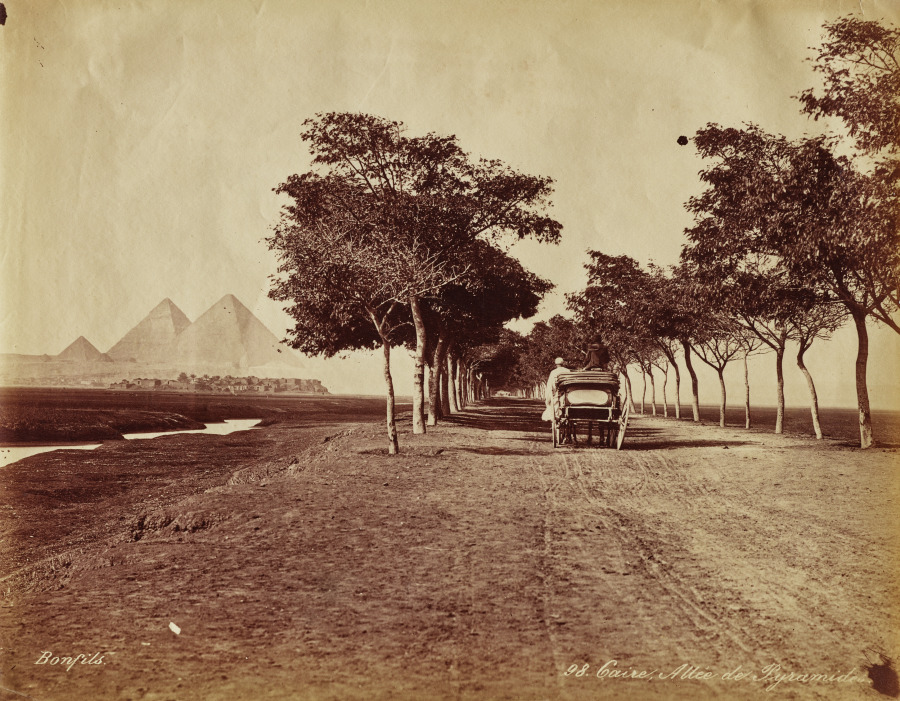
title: Caire. Allée de Pyramides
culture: France, 19th century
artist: Félix Bonfils (French, 1831–1885)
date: c. 1870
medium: albumen print from wet collodion negative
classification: Photograph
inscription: Imprinted in white on recto in lower left: “Bonfils”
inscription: Imprinted in white on recto inn lower right: “98. Caire, Allée de Pyramides"